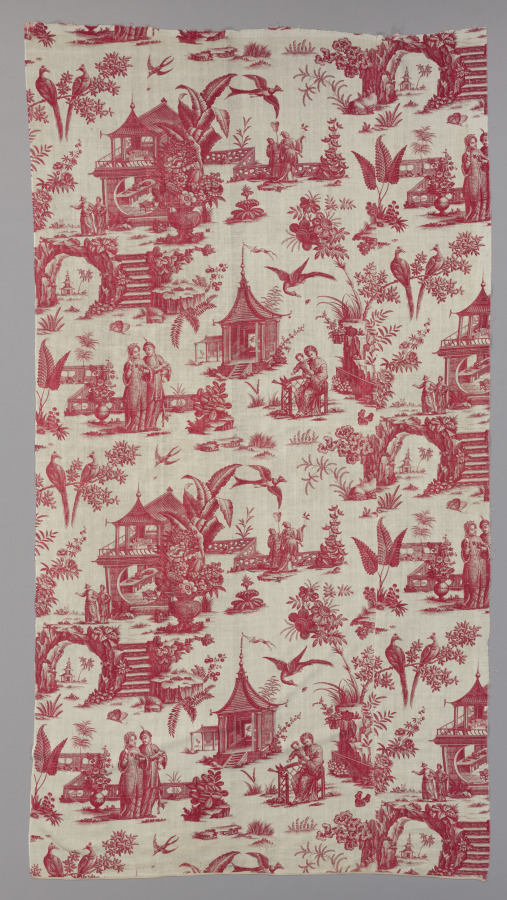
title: Copperplate-Printed Cotton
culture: England, Chambers, 18th century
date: 1700s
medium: copperplate printed cotton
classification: Textile